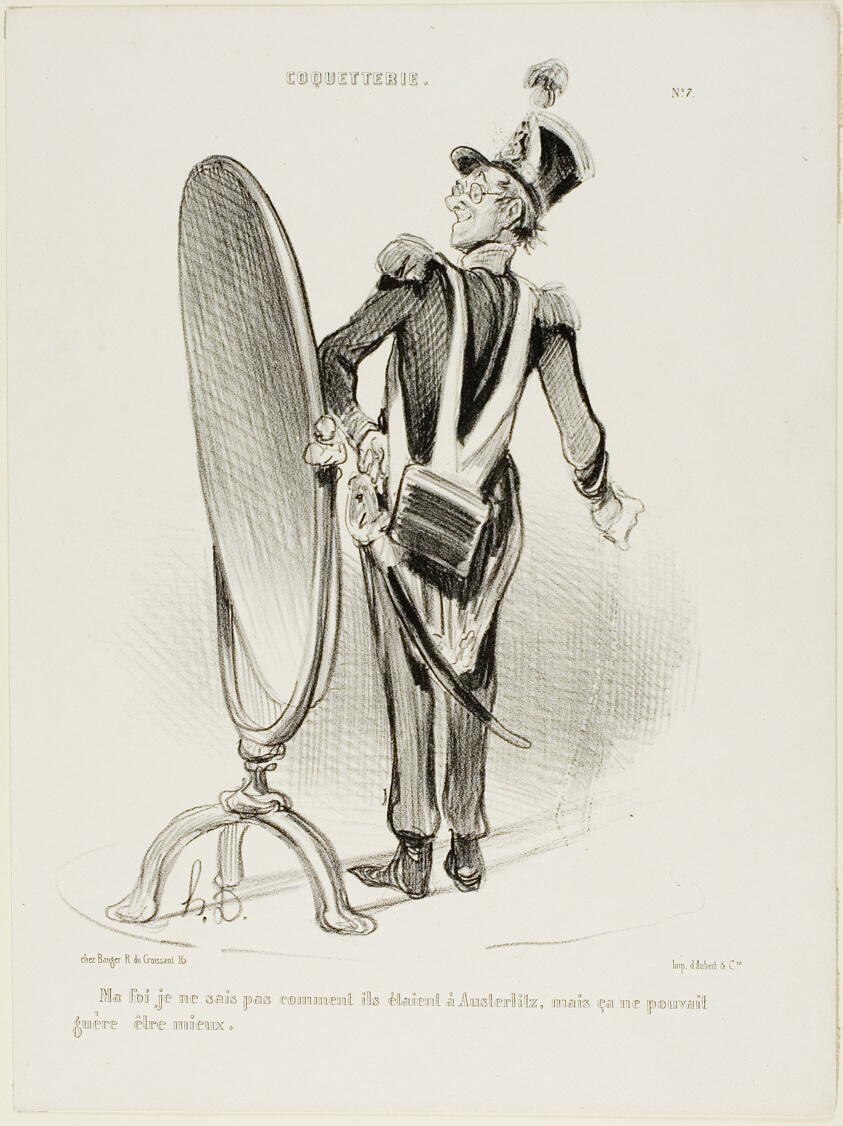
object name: Print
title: “Indeed, I don't know what they looked like at Austerlitz, but they could hardly have looked any better,” plate 7 from Coquetterie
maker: Honoré Victorin Daumier; French, 1808-1879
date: 1839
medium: Lithograph in black on white wove paper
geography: France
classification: lithograph; print; prints and drawing